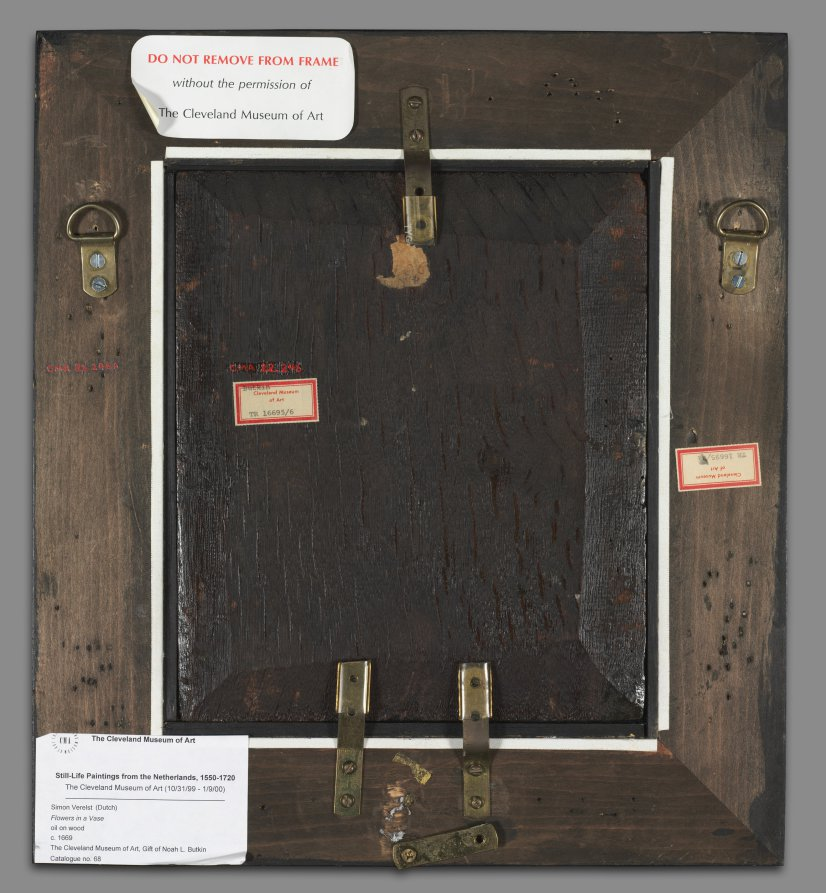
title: Flowers in a Vase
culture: Netherlands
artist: Simon Verelst (Dutch, 1644–1721)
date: c. 1669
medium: oil on wood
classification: Painting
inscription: signed S.V.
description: With just a few flowers, Verelst created a composition of great sophistication and balance. A simple glass flask is filled with a large rose, a red anemone, and a white narcissus tinged with pink. These flowers are surrounded by a scattering of smaller blossoms. Like many still-life painters, Verelst depicted a window reflected in the glass vase, but here he did not show the window's precise structure. He did, however, use another common device: the depiction of a few chips in the stone surface to make the material seem more tangible. Early in his career, Verelst moved from Holland to London, where he worked for the court of King James II and was extravagantly praised for the realism of his flower paintings.